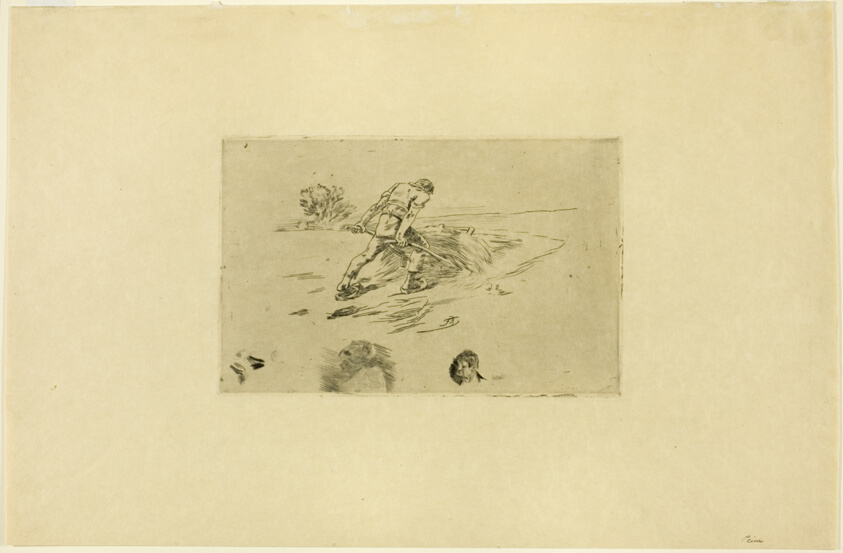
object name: Print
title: Toil, II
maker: Félicien Rops (Belgian, 1833-1898)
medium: Etching and drypoint on cream wove paper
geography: Belgium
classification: etching; print; prints and drawing